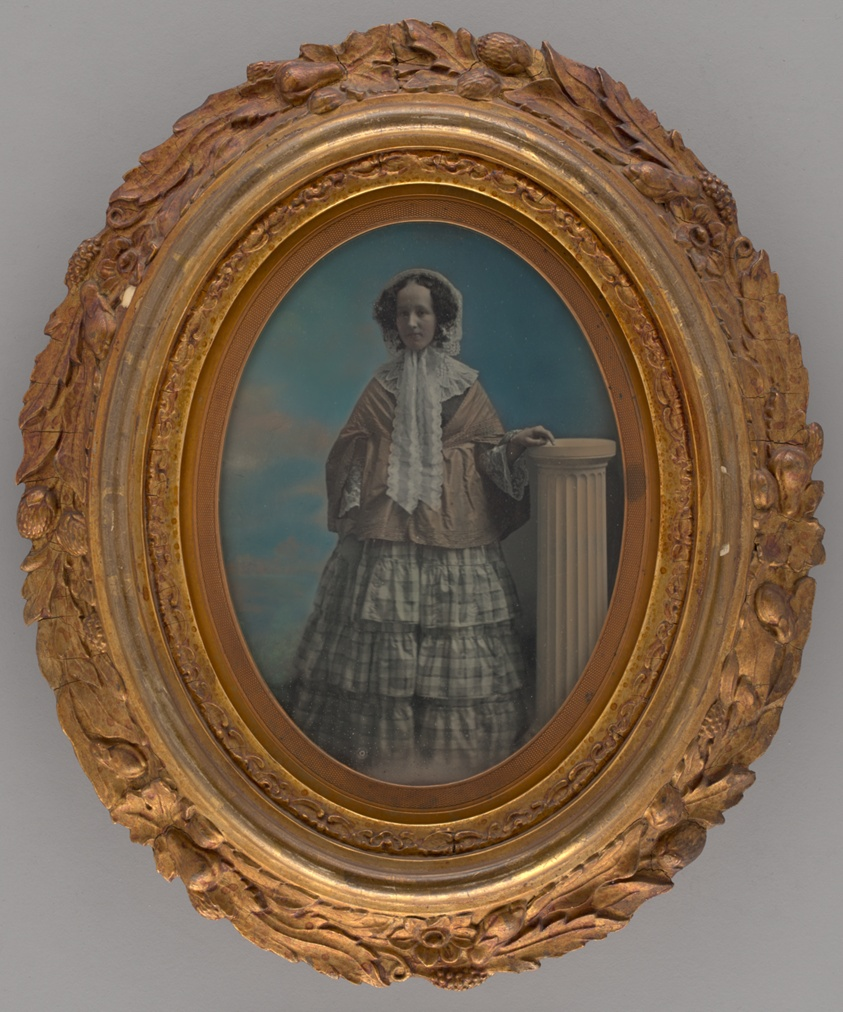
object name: Photograph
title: Untitled (Portrait of a Standing Woman)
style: 19th century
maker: Albert Sands Southworth (American, 1811-1894); and Josiah Johnson Hawes (American, 1808-1901)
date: 1850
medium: Daguerreotype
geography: United States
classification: portrait; photograph; photographic process; photography; portrait; daguerreotype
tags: lundberg collection, portraits, portraits: female subject